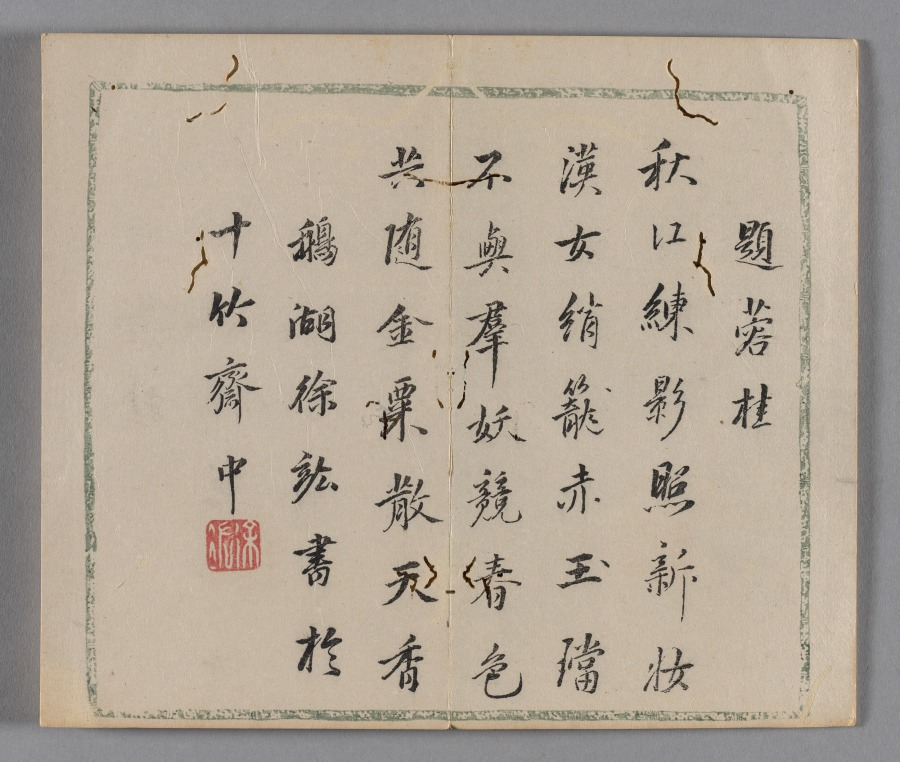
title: Ten Bamboo Studio Painting and Calligraphy Handbook (Shizhuzhai shuhua pu): Round Fans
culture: China, Qing dynasty (1644-1911)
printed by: Hu Zhengyan (Chinese, c. 1584–1674)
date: 1633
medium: Woodblock-printed book; ink and colors on paper; first edition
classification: Print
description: Color printing reached a level of perfection in the early 1600s, as seen in this Ten Bamboo Studio Collection of Calligraphy and Painting and the Mustard Seed Garden Manual of Painting (printed 1679 and 1701). The painterly quality, precision in registering (aligning) the woodblocks, and harmonious colors made them the most successful color print editions in Chinese history. Both editions were printed and compiled in Nanjing, spread nationwide, and had a great impact on the arts in Japan and Korea.